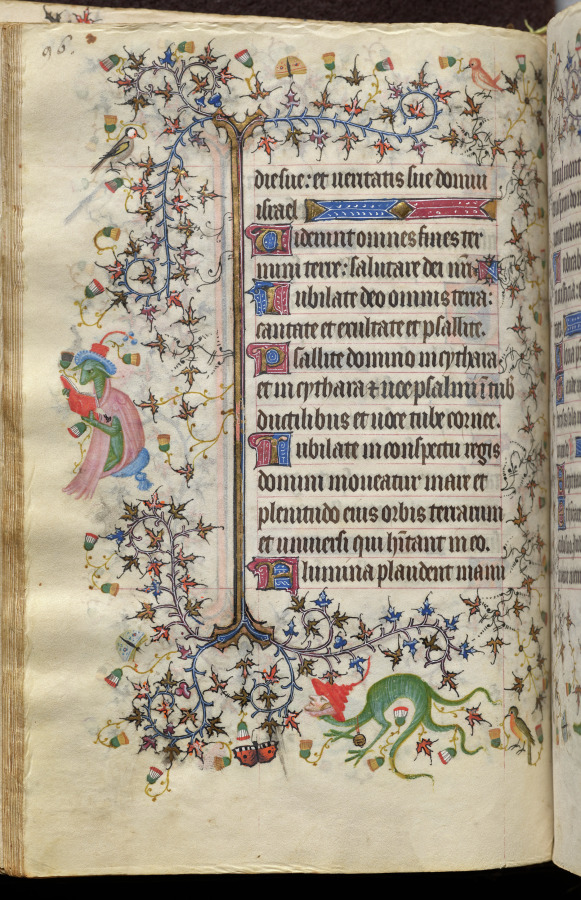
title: Hours of Charles the Noble, King of Navarre (1361-1425): fol. 48v, Text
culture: France, Paris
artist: Master of the Brussels Initials and Associates (French)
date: c. 1405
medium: ink, tempera, and gold on vellum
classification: Bound Volume